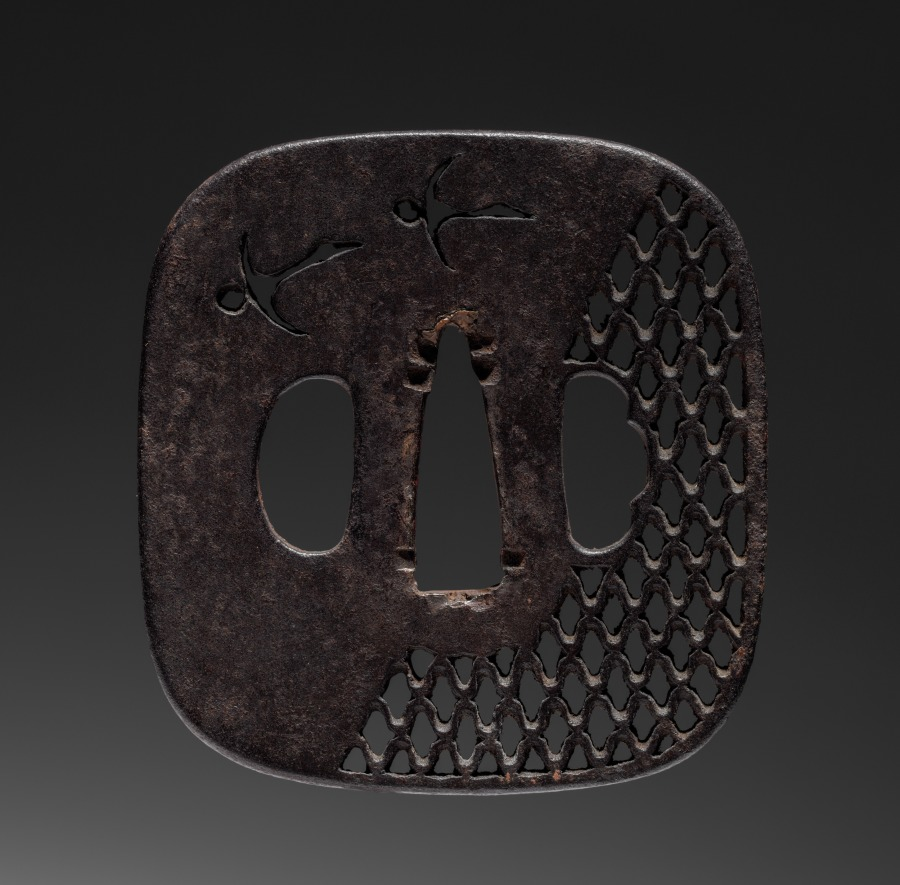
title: Sword Guard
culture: Japan, Edo period (1615–1868)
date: 1615–1868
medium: iron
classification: Arms and Armor